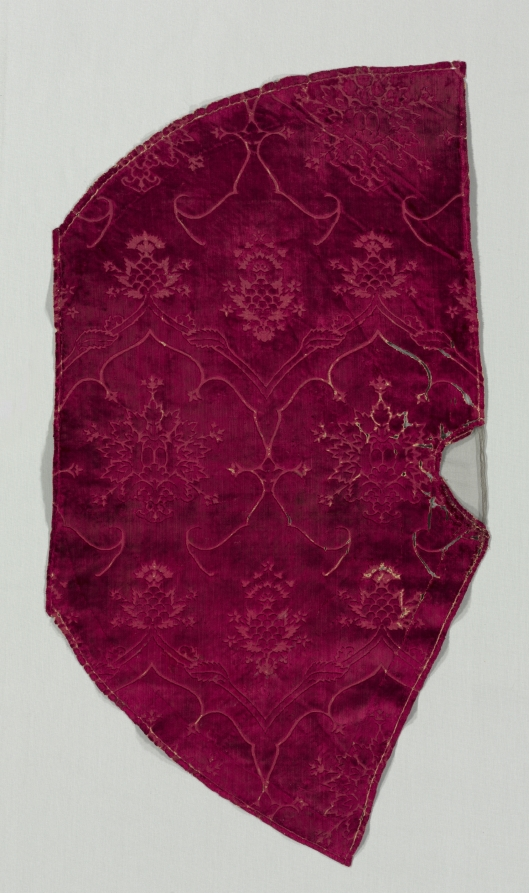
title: Pieces from Disassembled Cape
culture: Italy, 15th century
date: 1400s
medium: velvet (cut and voided); silk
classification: Velvet